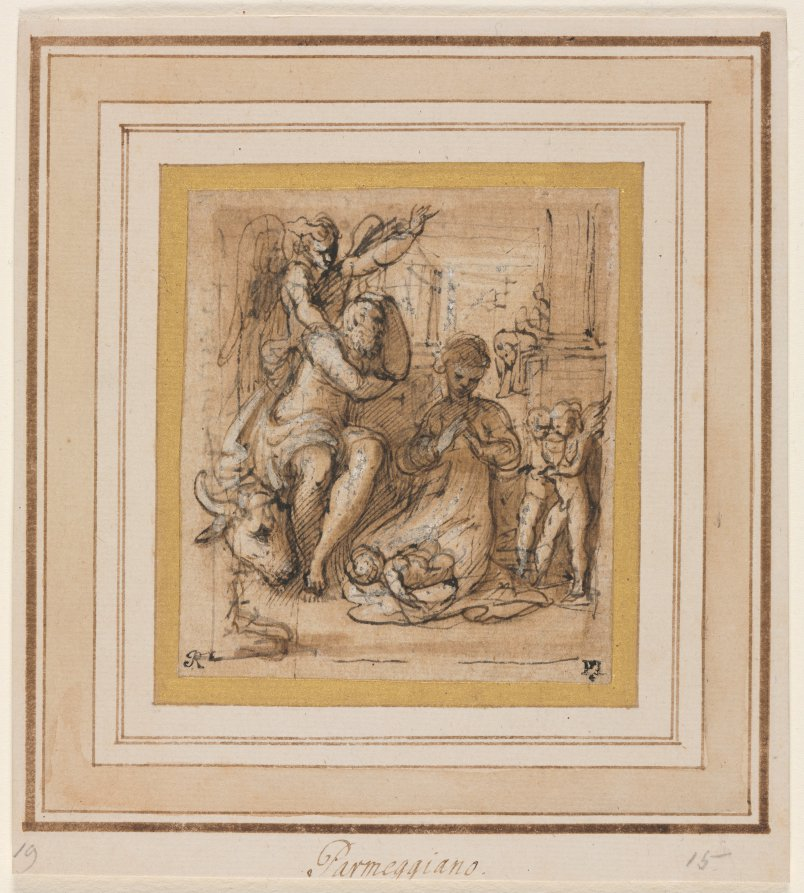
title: The Nativity with the Dream of Joseph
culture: Italy, 16th century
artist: Parmigianino (Italian, 1503–1540)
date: c. 1527/30?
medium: pen and brown and black ink and brush and brown wash, with traces of brush and black wash, heightened with lead white (oxidized)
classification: Drawing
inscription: RECTO OF SECONDARY SUPPORT, lower left, in graphite: 19 ; lower center, in brown ink: Parmeggiano. ; lower right, in graphite: 15 ; VERSO OF SECONDARY SUPPORT, lower center, in graphite: A 3541 ; FRAGMENT OF OLD MOUNT (now removed), across top, in graphite: Collns. Peter Lely (1618-1680) Lugt 2092 / J. Richardson Sr. (1665-1740) Lugt 2169. ; lower left, in graphite: Parmeggiano: The Nativity. ; across bottom, in graphite: (& Dream of joseph .. An[q?]u Waru[?]q / [lo?] [flu?] in [6?] [illegible] )